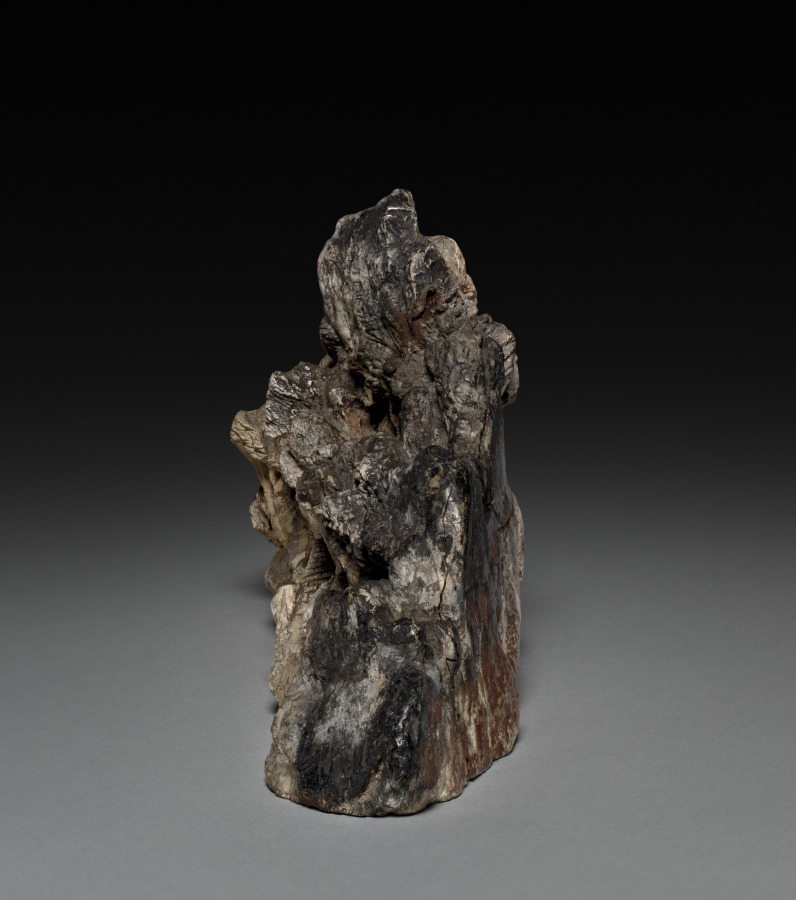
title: Mountain and Landscape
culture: China, Qing dynasty (1644-1911)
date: 1800s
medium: carved stone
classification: Jade